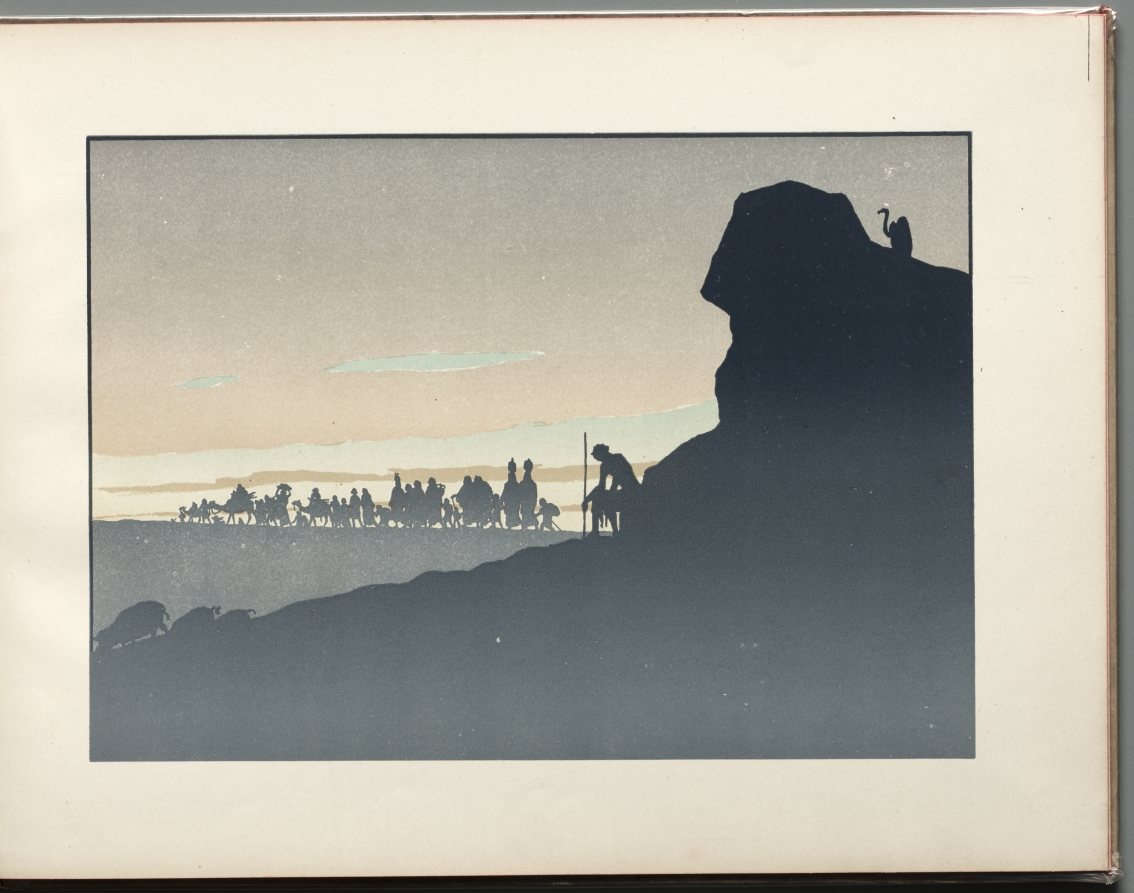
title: The Prodigal Son: Cinquième Tableau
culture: France, 19th century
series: Bound Volume illustrating the poetry and music of Georges Fragerolle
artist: Henri Rivière (French, 1864–1951)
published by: E. Flammarion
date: 1895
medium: 15 color lithographs in a bound volume illustrating the poetry and music of Georges Fragerolle: color lithograph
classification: Bound Volume